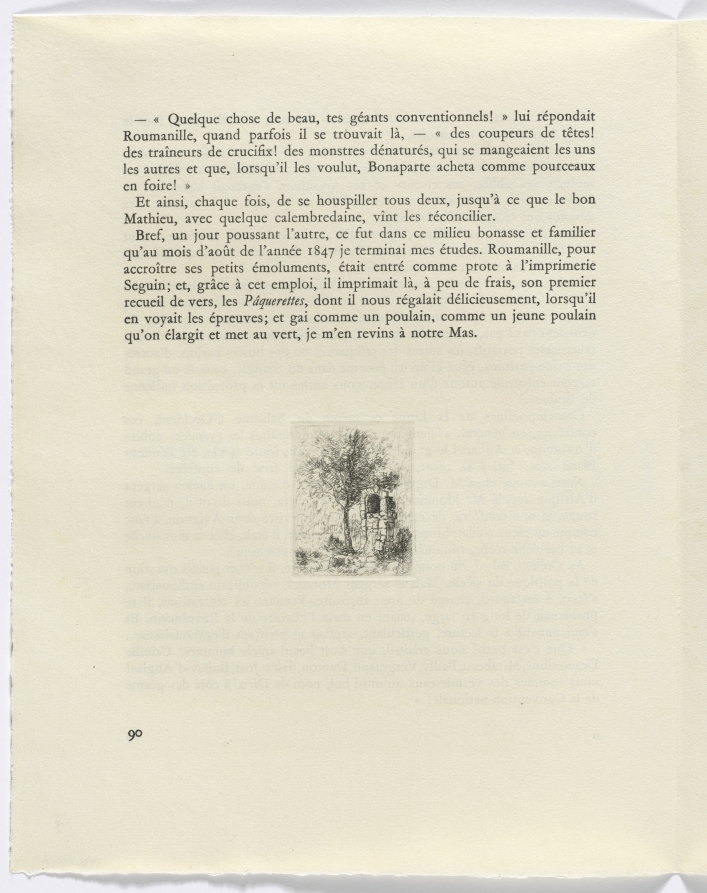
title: Frédéric Mistral: Mémoires et Recits by Frédéric Mistral: tree (page 90)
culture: France, 20th century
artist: Auguste Brouet (French, 1872–1941)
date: 1937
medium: etchings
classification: Portfolio